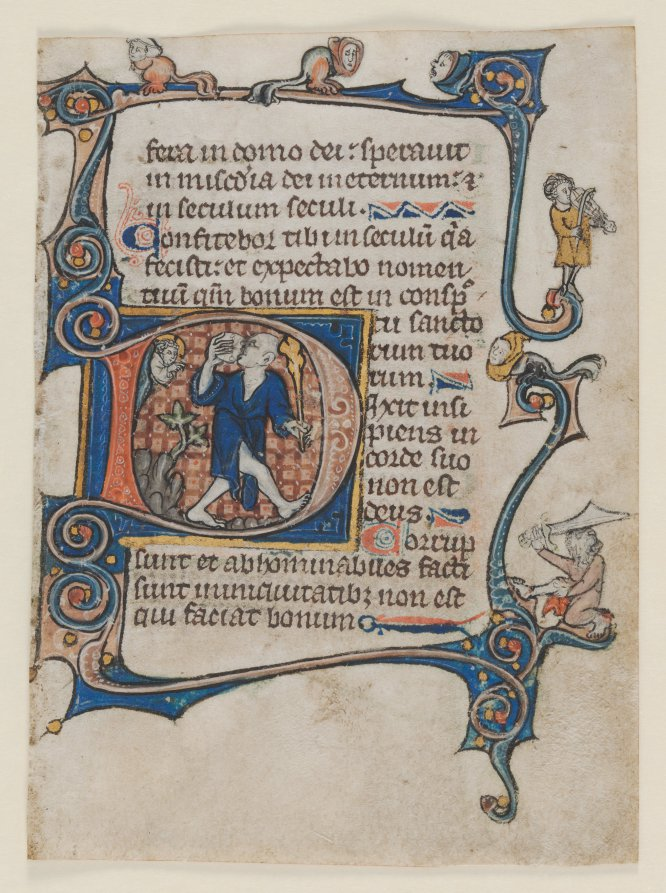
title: Leaf from a Psalter: Initial D: A Fool Rebuked by God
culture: Northern France or Flanders, St. Omer or Thèrouanne, 14th century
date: c. 1300–1320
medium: ink, tempera and gold on vellum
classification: Manuscript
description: The decorative marginal outgrowths, or extenders, of this initial include an assortment of drolleries—grotesque, often hybridized little figures that typically engage in amusing and diversionary activities. Drolleries are often shown playing musical instruments. Here one may be seen playing a vielle, an early stringed instrument played with a bow. The profusion of drolleries and whimsical marginalia in illuminated manuscripts, especially psalters, became increasingly popular around 1300, a phenomenon that has been much analyzed by scholars. Probably produced for a pious lay clientele, the margins of these tiny psalters are filled with endlessly varied and often highly animated animals, persons of every occupation (including clerics), hybrids, and monsters. Their function was often satirical and was clearly meant to amuse and give enjoyment. They may have also functioned as a kind of visual cue, enabling a book's user to locate specific pages and texts.